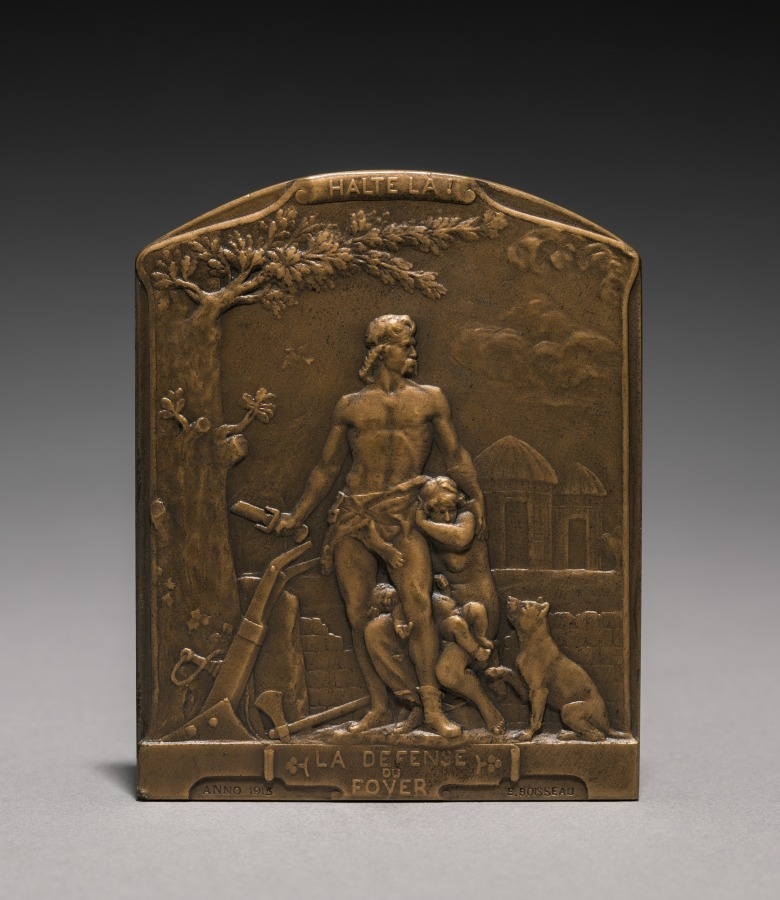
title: Medal (obverse)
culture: France, 20th century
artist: Emile André Boisseau (French, 1842–1923)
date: 1914–1918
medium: bronze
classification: Metalwork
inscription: above: "Halte là"; below: "La defense du foyer."